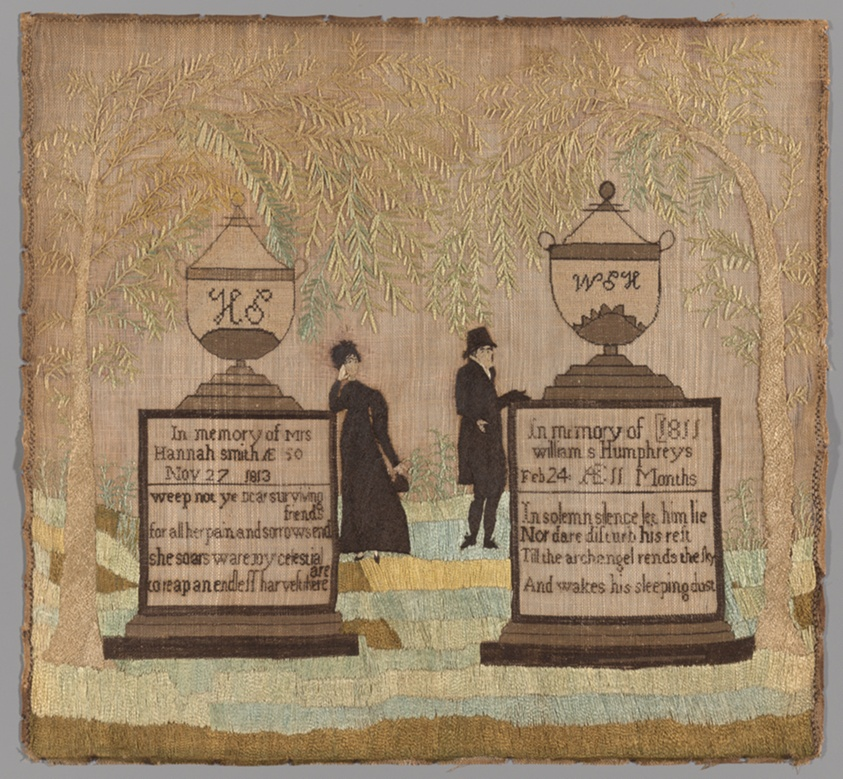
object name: Textile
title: Mourning Sampler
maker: Made by the Smith and Humphreys Families; Miss Field's School; Boston, Massachusetts, United States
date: c. 1815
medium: Linen, plain weave; embroidered with silk floss in tent, cross, long and a mixture of stem, whip and couching stitches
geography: Massachusetts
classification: textile; needlework (visual works); sampler